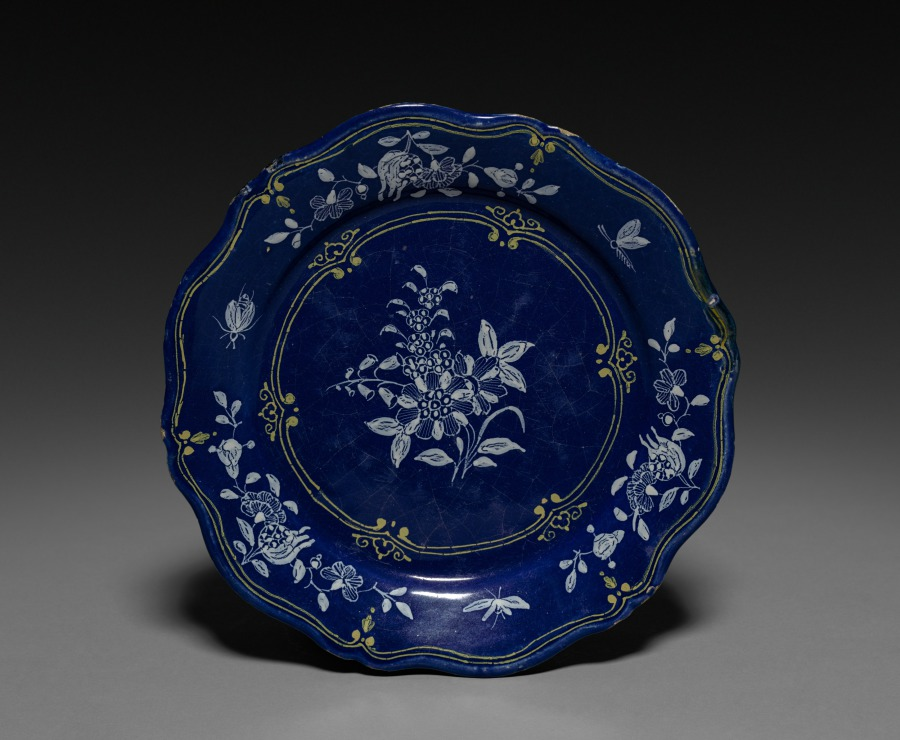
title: Plate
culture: France, 18th century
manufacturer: Saint Omer Factory (French)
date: c. 1765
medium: faience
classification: Ceramic